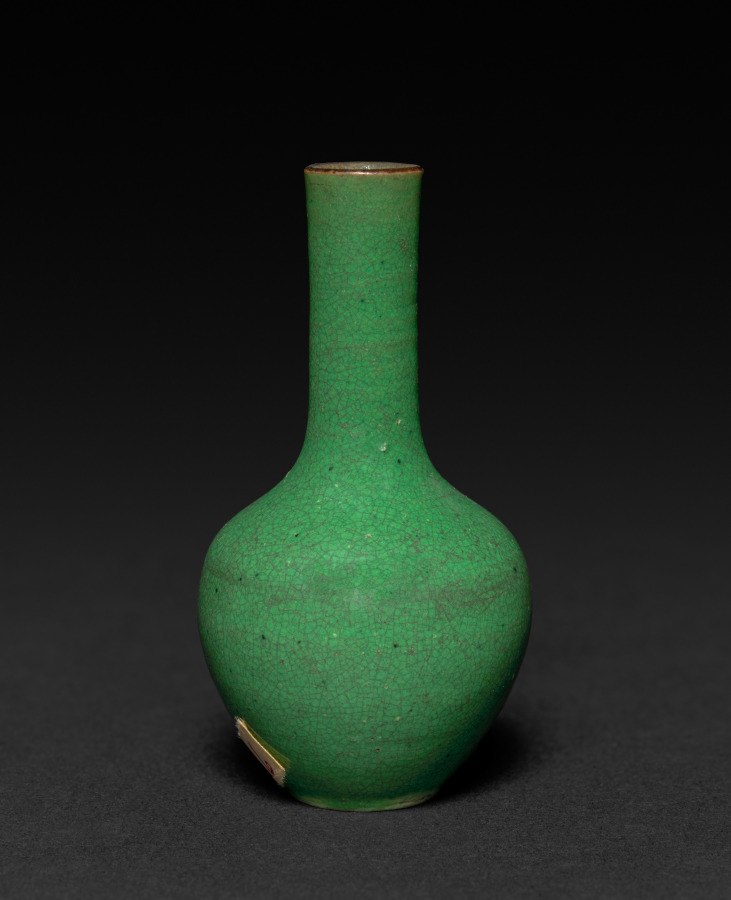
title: Vase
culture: China, Qing dynasty (1644-1911)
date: 1644–1911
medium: porcelain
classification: Ceramic